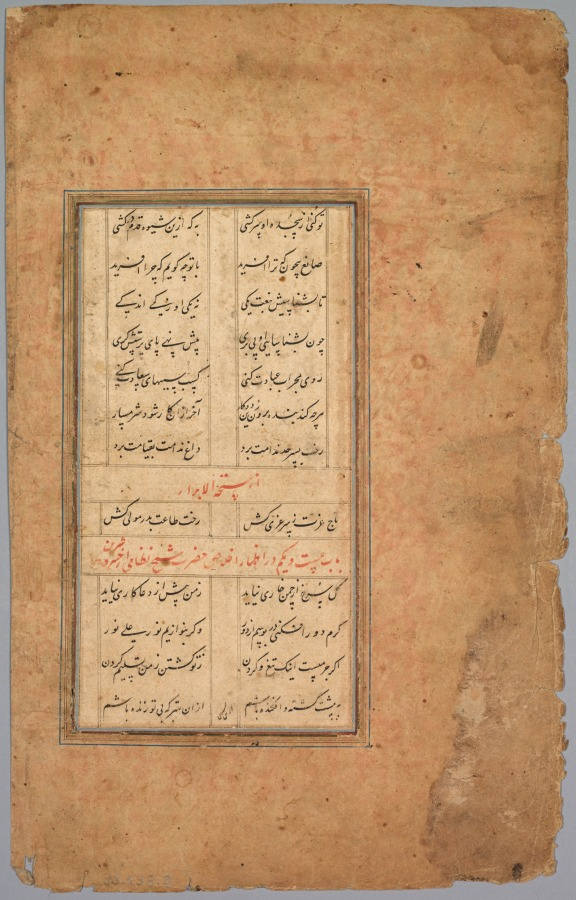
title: School Exercise Alphabet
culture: India, Mughal Dynasty (1526-1756)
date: 18th century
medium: ink on paper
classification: Manuscript